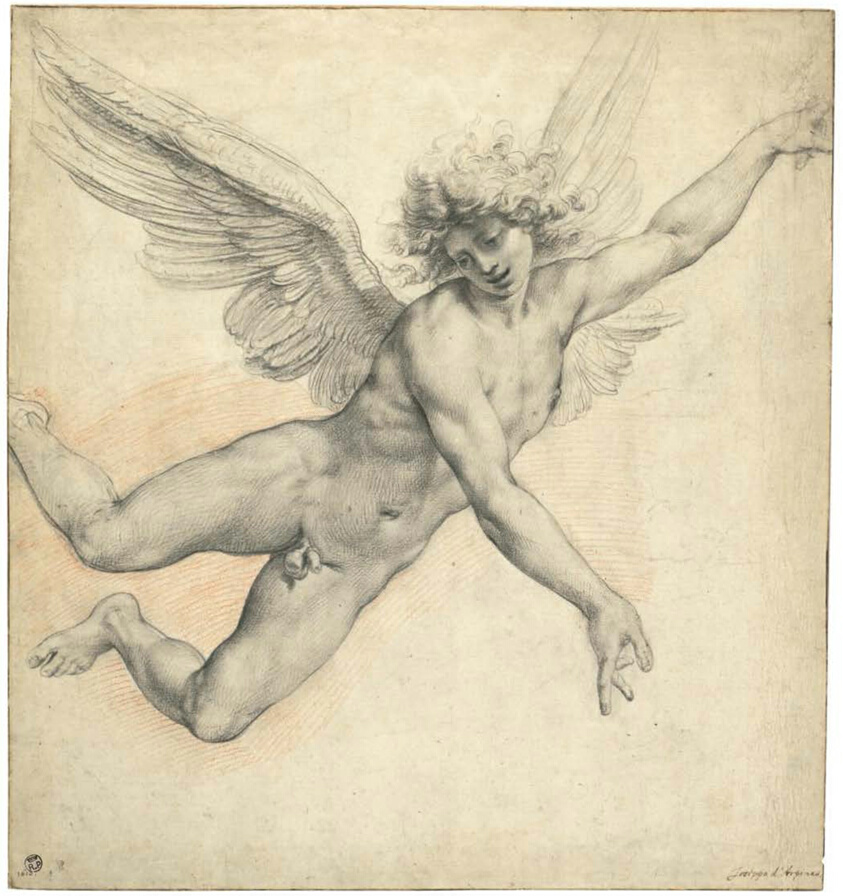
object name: Drawing and Watercolor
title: An Angel in Flight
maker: Giuseppe Cesari, called Il Cavaliere d’Arpino; Italian, 1568–1640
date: c. 1599-1600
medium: Black chalk with red chalk on cream laid paper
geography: Italy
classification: prints and drawing; chalk; drawing; paper